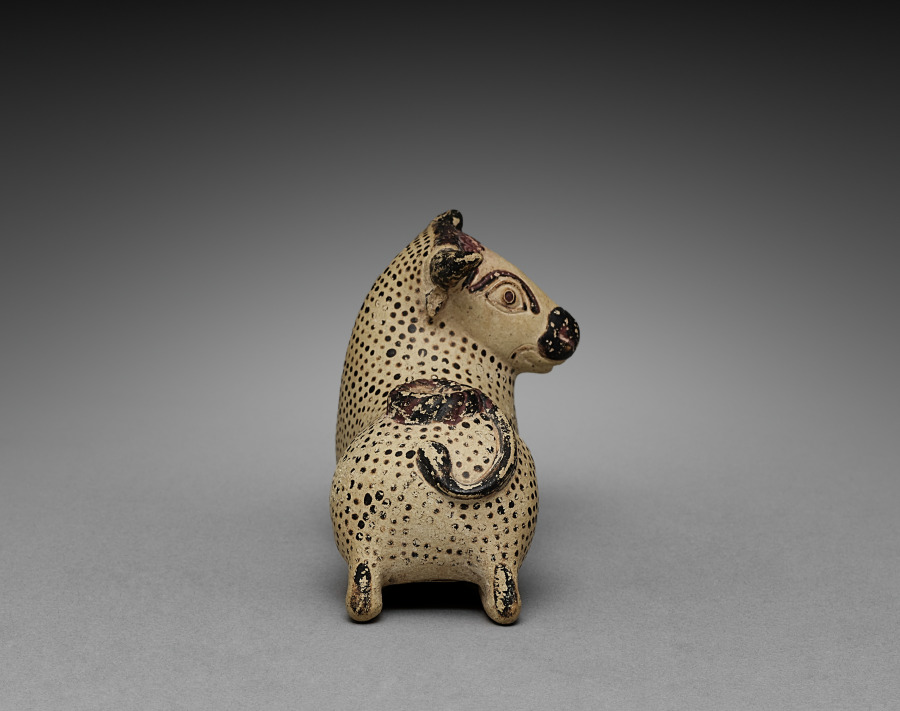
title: Oil Flask in the Shape of a Bull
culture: Greek, Corinthian or modern forgery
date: 600–575 BCE or 1900s CE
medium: ceramic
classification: Ceramic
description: This small bull-shaped flask is similar in form and painted decoration to a class of figure-shaped perfume vessels created during the late seventh and early sixth centuries BC in Greece and Italy (especially Corinth, Rhodes, and Etruria). The stippled body decoration characterizes such vases from multiple sites, while the light-colored clay and inconspicuous orifice placement are typical of Corinth. But no other reclining bulls are known among such vases (and only a few bullheads or upper bodies), raising questions about authenticity. A 1986 analysis determined that this object had been recently fired, and a 2020 clay analysis placed its origin in the Catalonia region of Spain, far from any known ancient production area for such flasks.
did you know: The curled tail masks a filling hole atop the back.